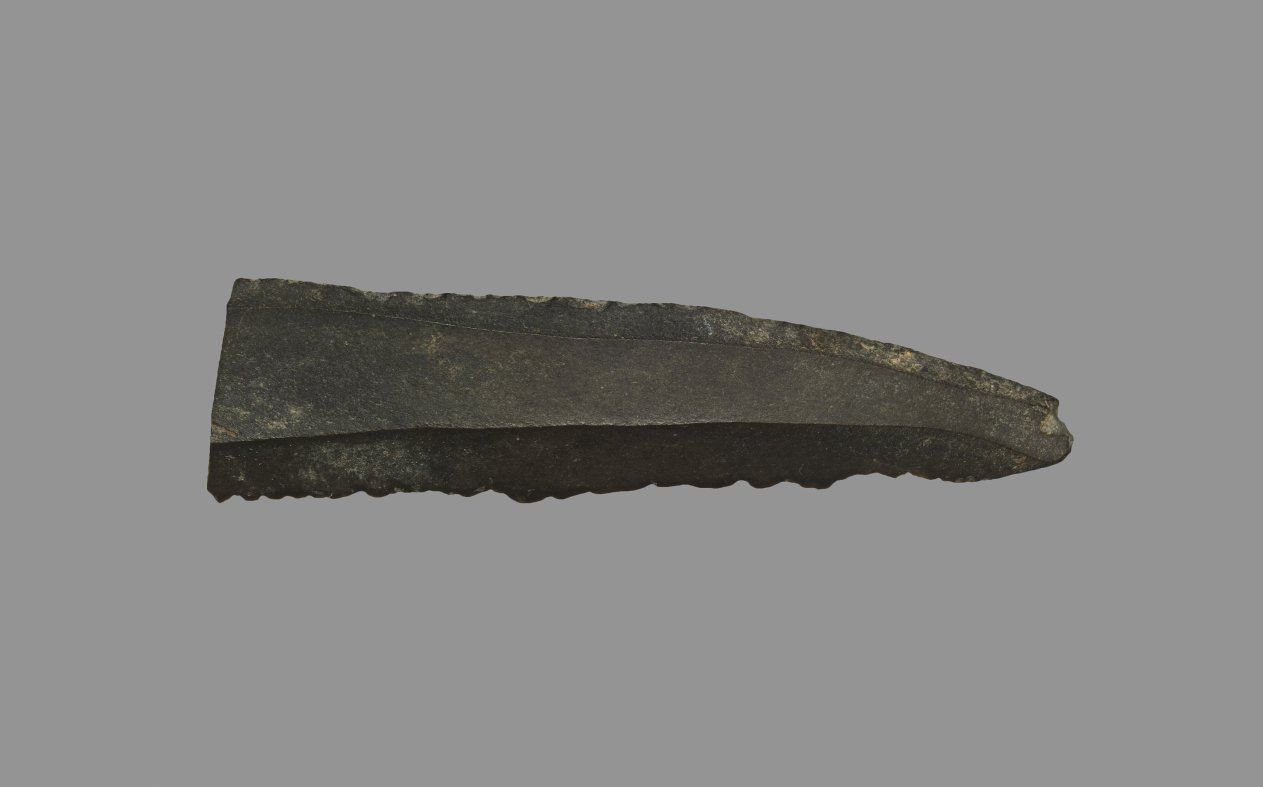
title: Sickle Blade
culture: Egypt, Middle Kingdom (2040–1648 BCE), Dynasty 12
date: 1980–1801 BCE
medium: flint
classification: Implements